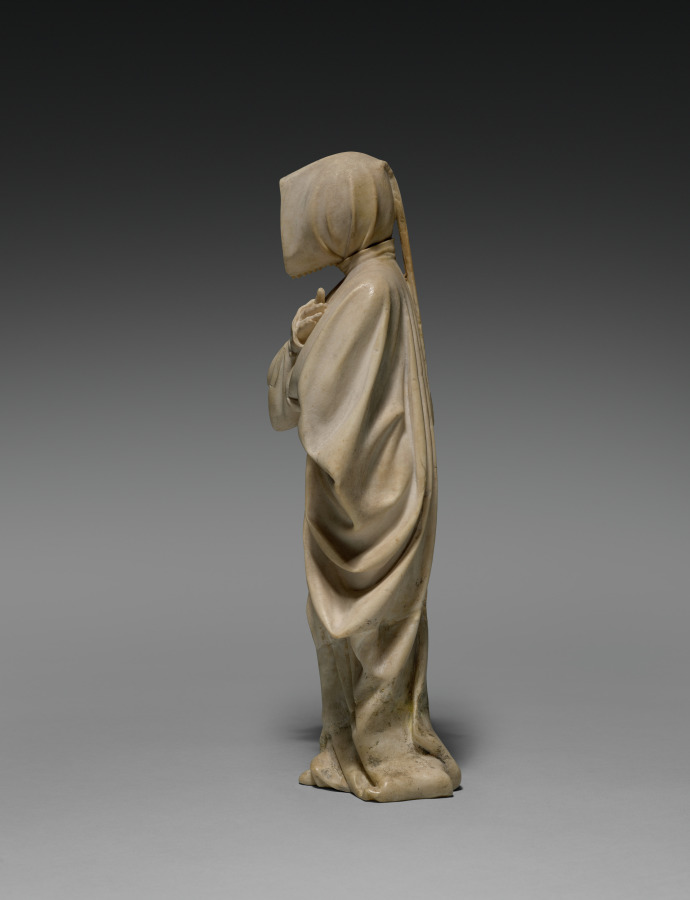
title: Mourner from the Tomb of Philip the Bold, Duke of Burgundy (1364–1404)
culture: Netherlands, active Dijon, 15th century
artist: Claus de Werve (Netherlandish, 1380–1439)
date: 1404–10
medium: vizille alabaster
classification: Sculpture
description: This figure comes from the tomb of Duke Philip the Bold from the church of Champmol near Dijon (Burgundy, France). Philip, who founded the monastery and designated it as his burial place, hired the best artists, many of whom came from the Netherlands. While the commission was given in 1381, the work was not completed until 1410, six years after the duke’s death. This mourner is unusual for the time because it is not carved as a static low relief on the pedestal of the tomb but interacts with the viewers and their fellow procession members. The lifelike quality of the figure is due in large part to the alabaster. Its softness allowed artists to carve details into the material, and the transparent, milky white stone could also be polished to a high gloss.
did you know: A plaster cast of this mourner decorates the empty niche in the Tomb of Philip the Bold in Dijon, France.